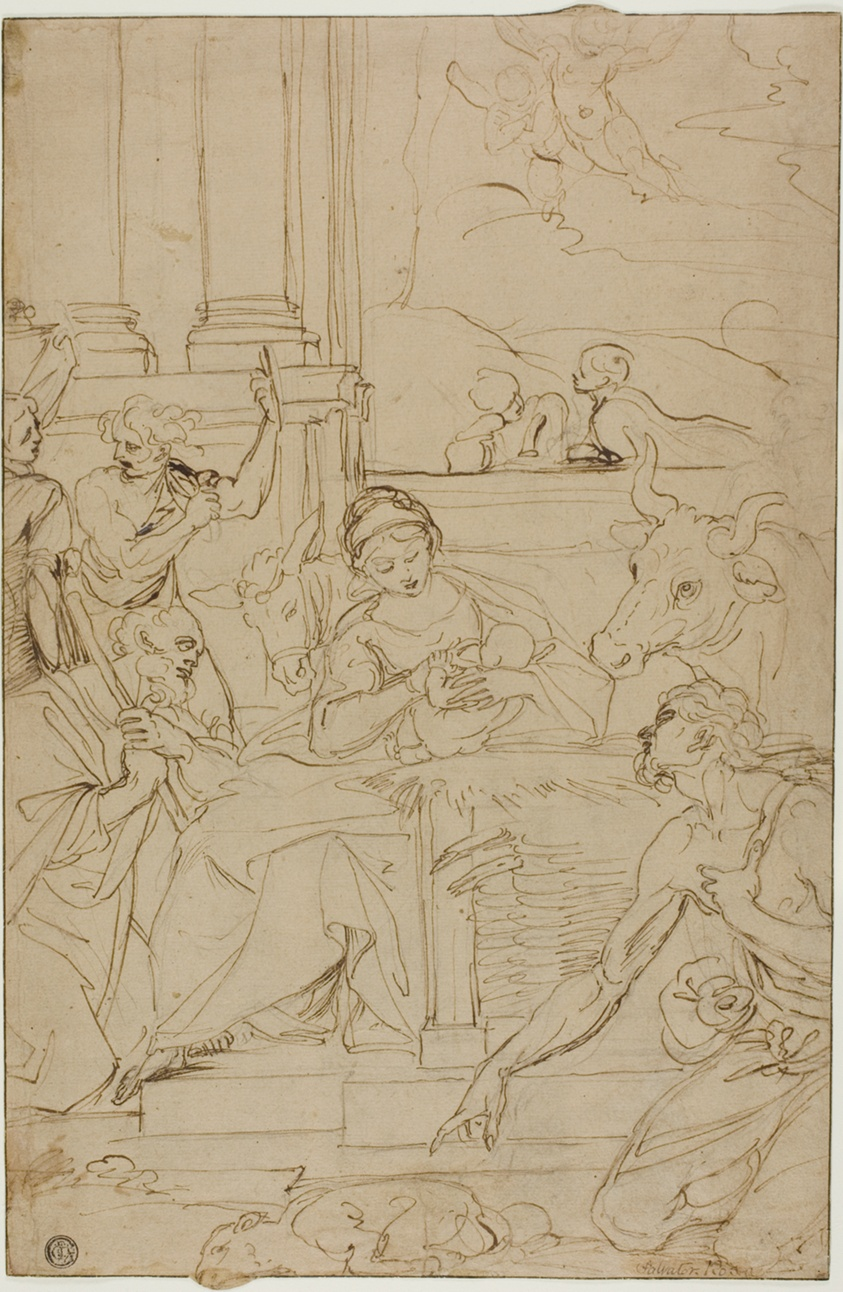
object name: Drawing and Watercolor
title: Adoration of the Shepherds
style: medieval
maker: Attributed to Agostino Carracci; Italian, 1557-1602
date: c. 1580-1600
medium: Pen and brown ink, over black chalk, with incising, on tan laid paper, laid down on ivory laid paper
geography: Italy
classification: pen and ink drawings; manuscript; drawings (visual works); prints and drawing